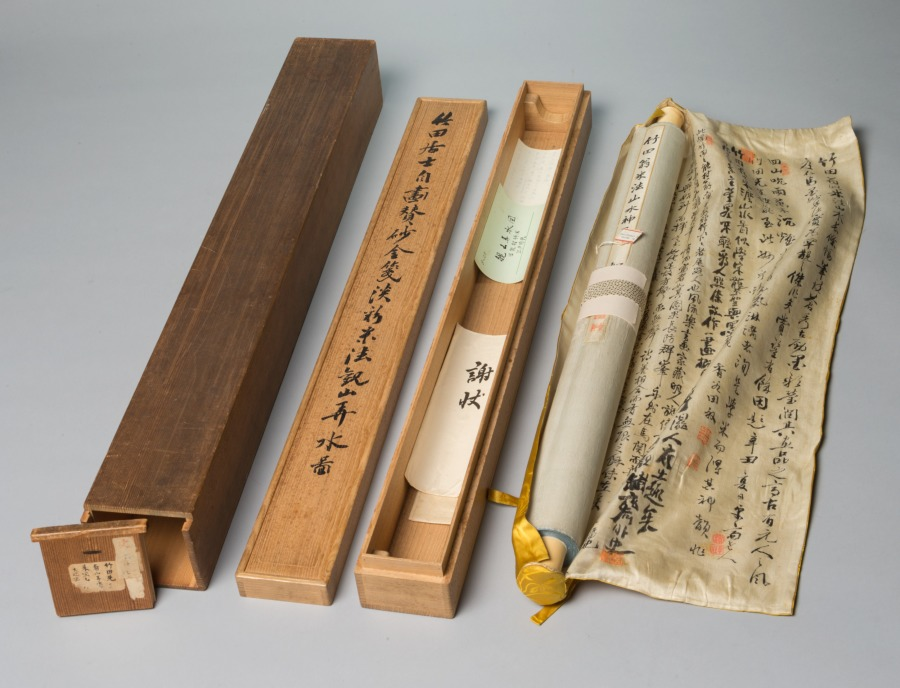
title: Mountain View and Blue Water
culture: Japan, Edo period (1615–1868)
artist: Tanomura Chikuden (Japanese, 1777–1835)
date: early 1800s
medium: hanging scroll; ink, color, and gold on paper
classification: Painting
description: Tanomura Chikuden was an eminent painter whose adopted son, Tanomura Chokunyū (1814–1907), was Seifū Yohei III’s painting teacher. This work was displayed at a gathering commemorating the 10th anniversary of Chokunyū’s death, something we know only because its custom-made box and archival documents have been carefully kept together. The box inscription also confirms that Chikuden was emulating the style of the Mi family of painters, active during China’s Southern Song dynasty (1127–1279). The painting’s Chinese-style silk wrapper is inscribed and sealed on its interior by members of Chokunyū’s community.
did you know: The mountain shapes are built up with multiple small wet strokes.